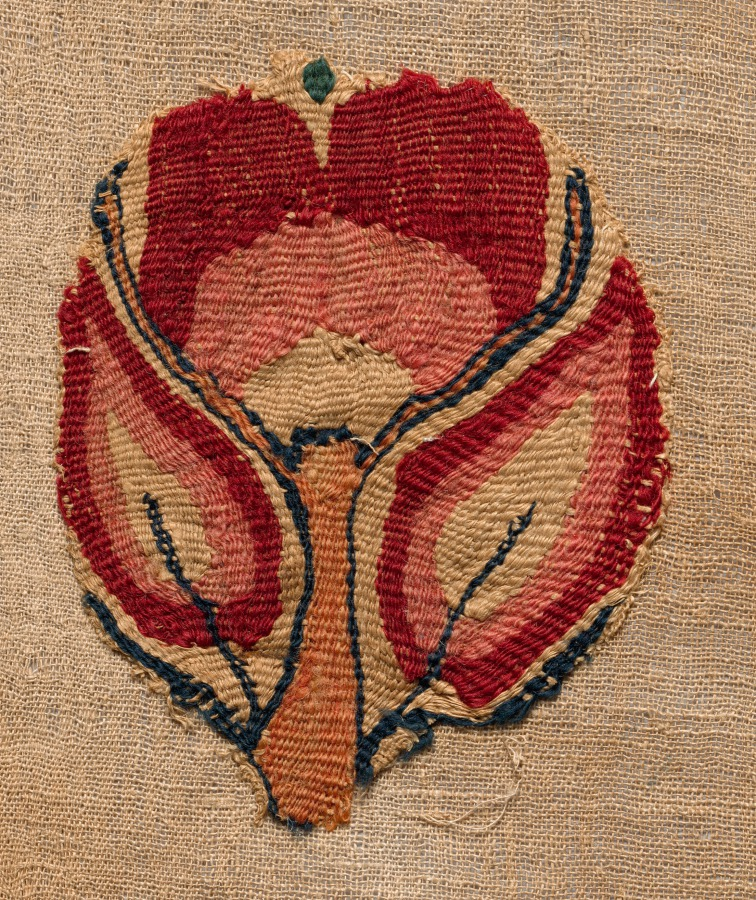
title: Fragments from a Curtain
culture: Egypt, Byzantine period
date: 300s–500s CE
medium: tapestry (originally inwoven in tabby ground, applied to plain tabby linen); linen and wool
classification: Textile